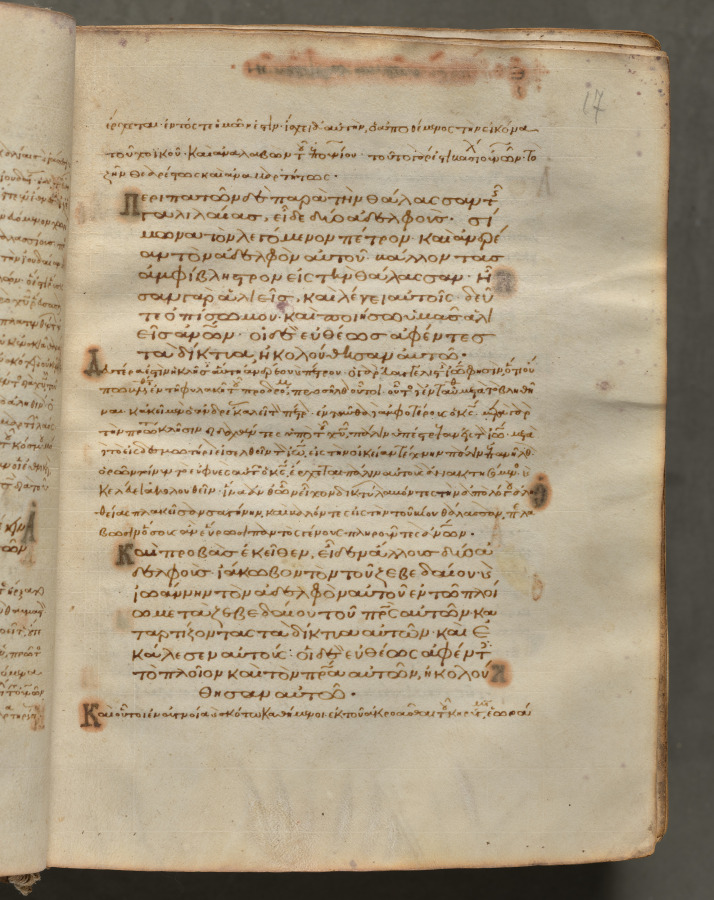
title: Text, folio 17 (recto), from a Gospel Book with Commentaries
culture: Byzantium, Constantinople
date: c. 1000–1100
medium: ink, tempera, and gold on vellum; leather binding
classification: Bound Volume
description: Each of the four gospels in this book opens on a page with brilliantly illuminated borders depicting the author of the text as well as birds-principally peacocks, symbols of the immortality of the soul-and fountains, representing the fountain of life and the salvation of the soul. This volume consists of 428 leaves with texts in Greek. Its level of sophistication suggests that it was probably written and decorated in a monastery in Constantinople.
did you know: Gospel Books were carried in procession through Byzantine churches.